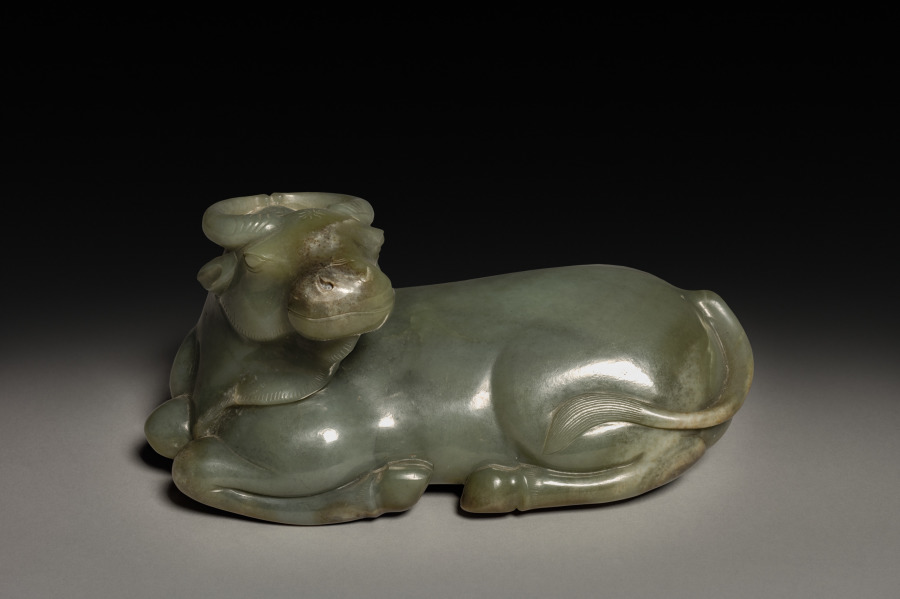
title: Reclining Water Buffalo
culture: China, Qing dynasty (1644-1911)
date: 1644–1911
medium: jade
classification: Jade